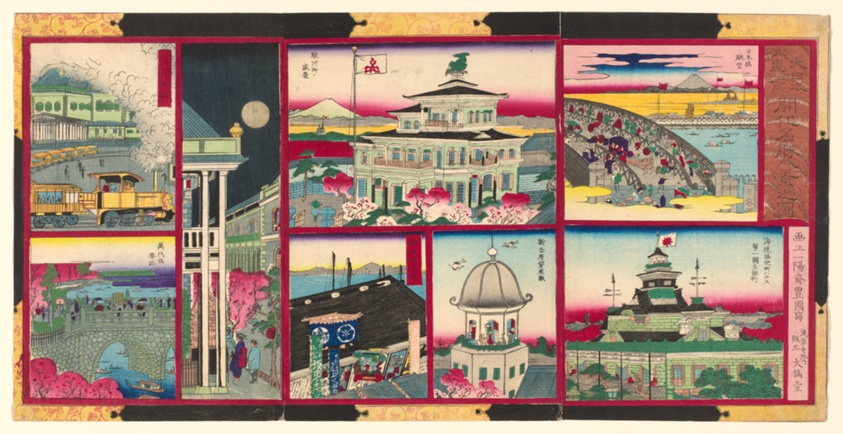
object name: Print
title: Eight Modern Views of Famous Places in Tokyo of Great Japan (Dai Nippon Tokyo kaika meisho hakkei no zu)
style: Japanese (culture or style)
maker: Utagawa Kunisada II (Kunimasa III, Toyokuni IV) (Japanese, 1823-1880)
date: 1875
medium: Color woodblock print; oban triptych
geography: Japan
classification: woodblock print; print; asian art